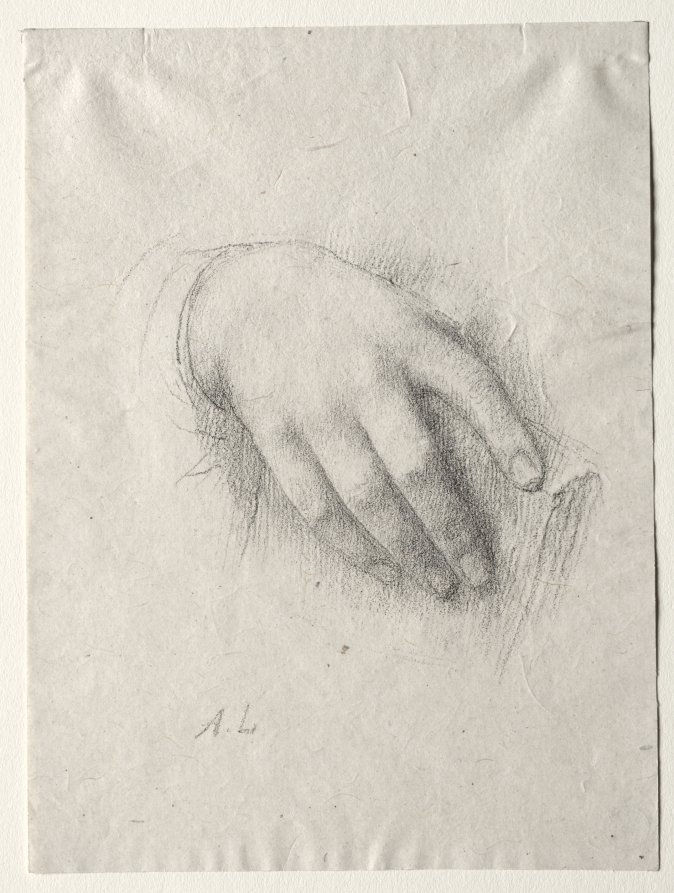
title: Study of Hands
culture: France, 19th century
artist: Alphonse Legros (French, 1837–1911)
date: c. 1857–1911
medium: lithograph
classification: Print